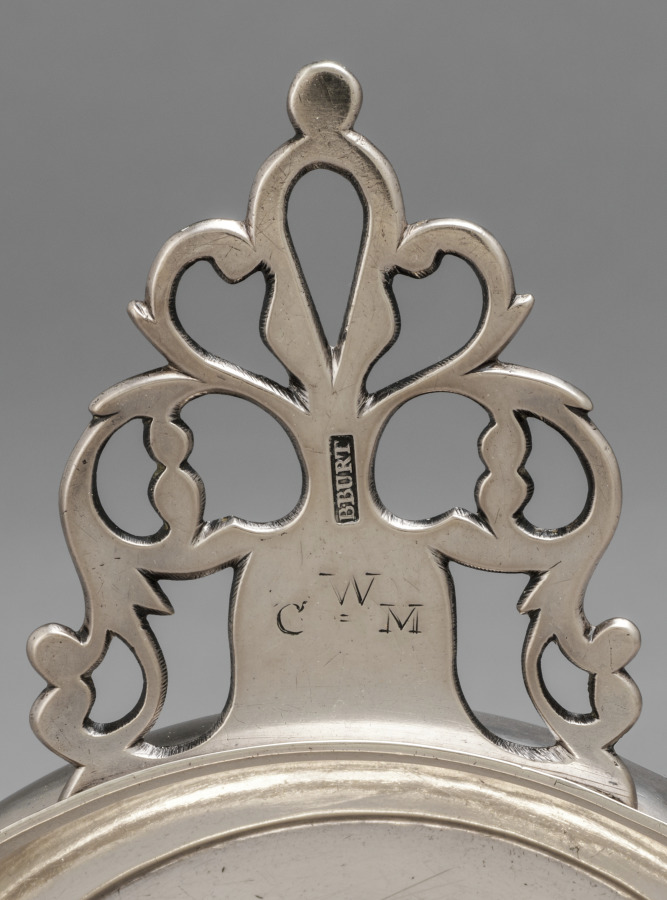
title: Porringer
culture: America, Massachusetts, Boston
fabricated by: Benjamin Burt (American, 1729–1805)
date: c. 1750–1800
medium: silver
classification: Silver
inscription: engraved "W" over "C=M" in block letters below mark on top of handle.